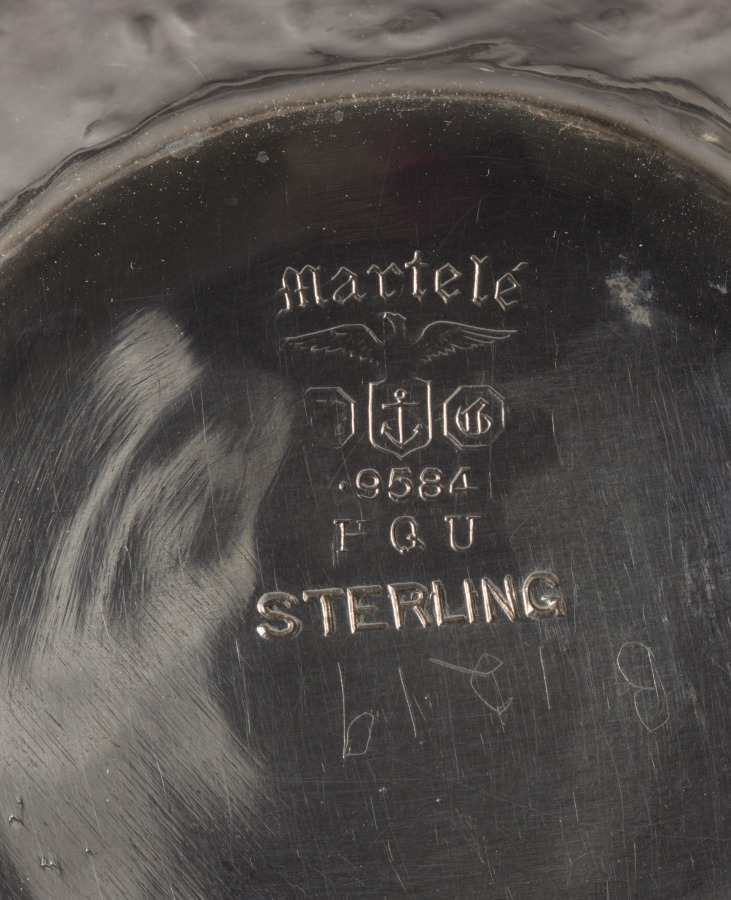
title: Martelé Coffee Service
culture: America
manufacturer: Gorham Manufacturing Company (America, est. 1831)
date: c.1900–1910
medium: silver, ivory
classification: Silver